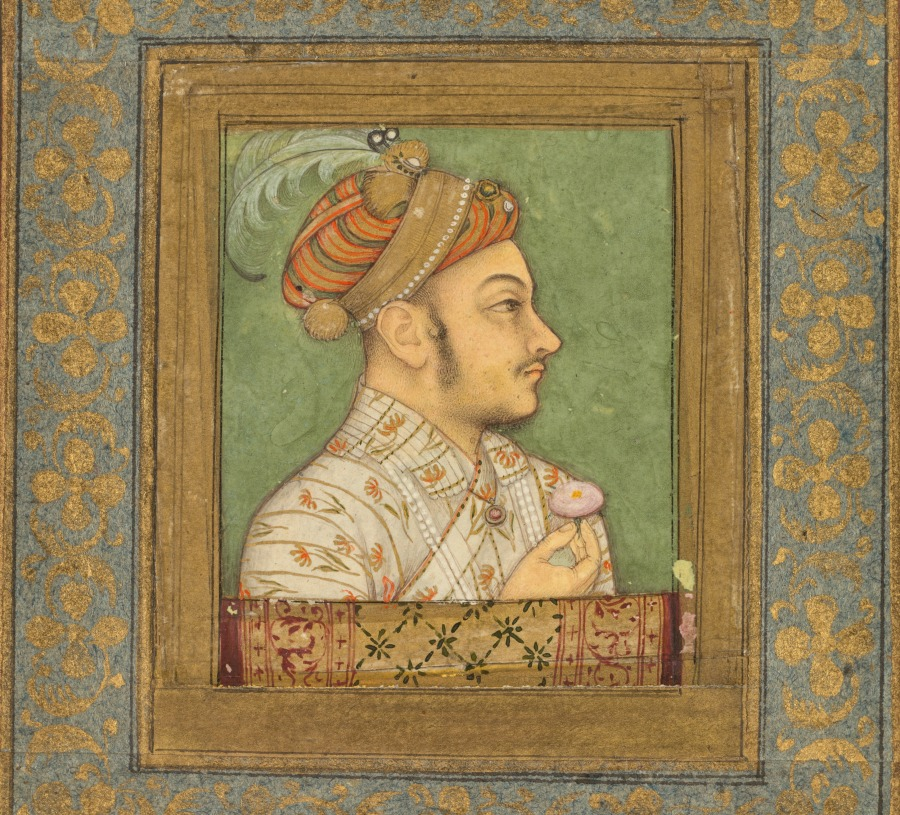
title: Portrait of Murad Bakhsh (1624–61)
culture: Mughal India, court of Shah Jahan (reigned 1628–58)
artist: attributed to Balchand (Indian, active 1595–c. 1650)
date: c. 1635; borders c. 1700s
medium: gum tempera and gold on paper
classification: Painting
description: The miniature portrait of a Mughal prince is now mounted on an album page. Originally, it was in a gemstone setting as a “portrait jewel” to be worn by family and supporters at court. India’s ruling elite had been wearing portrait jewels since Sir Thomas Rowe (about 1581–1655) presented British portrait miniatures and cameos to the Mughal emperor as part of a diplomatic gift in 1616, when he successfully negotiated for British access to India’s ports.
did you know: This portrait belonged to a cousin of Sir Winston Churchill.